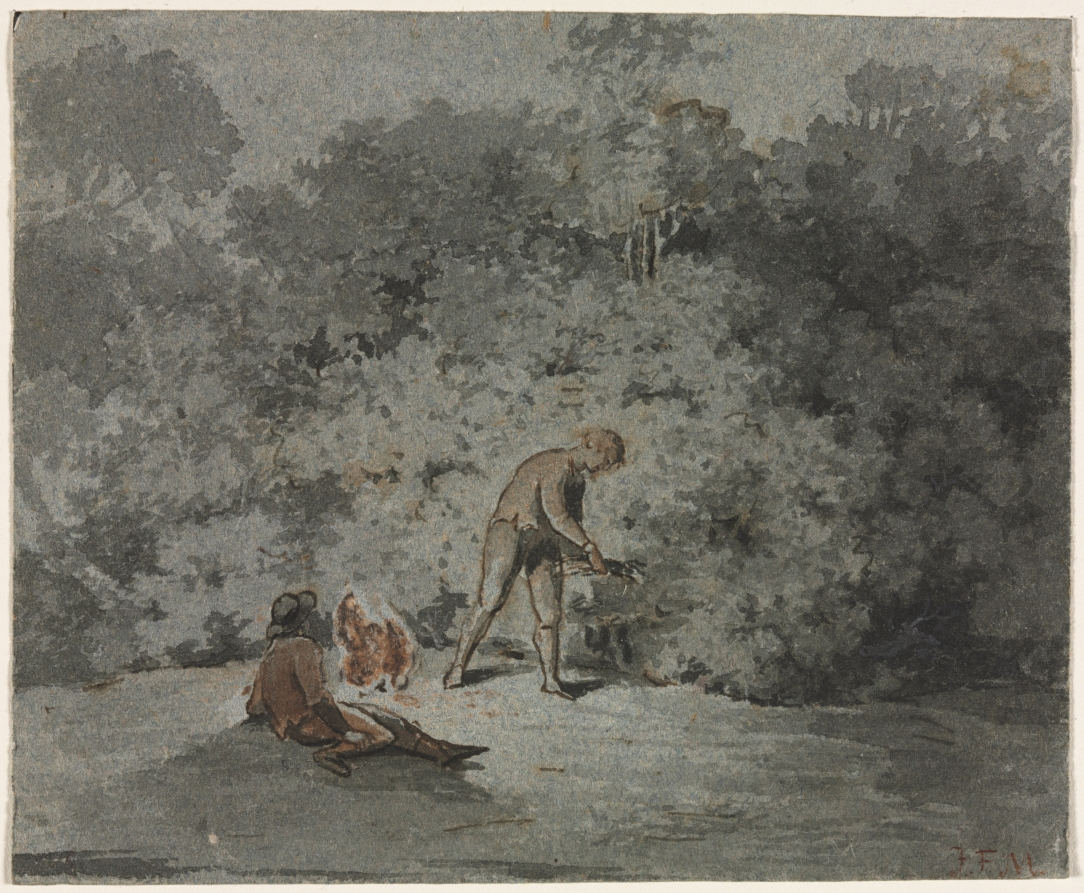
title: Faggot Gatherer (recto)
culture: France, 17th century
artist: attributed to Francisque Millet (French, 1642–1679)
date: c. 1650–75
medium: pen and brown ink and brush and gray and brown wash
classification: Drawing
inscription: signed, lower right, in brown ink: J.F.M.